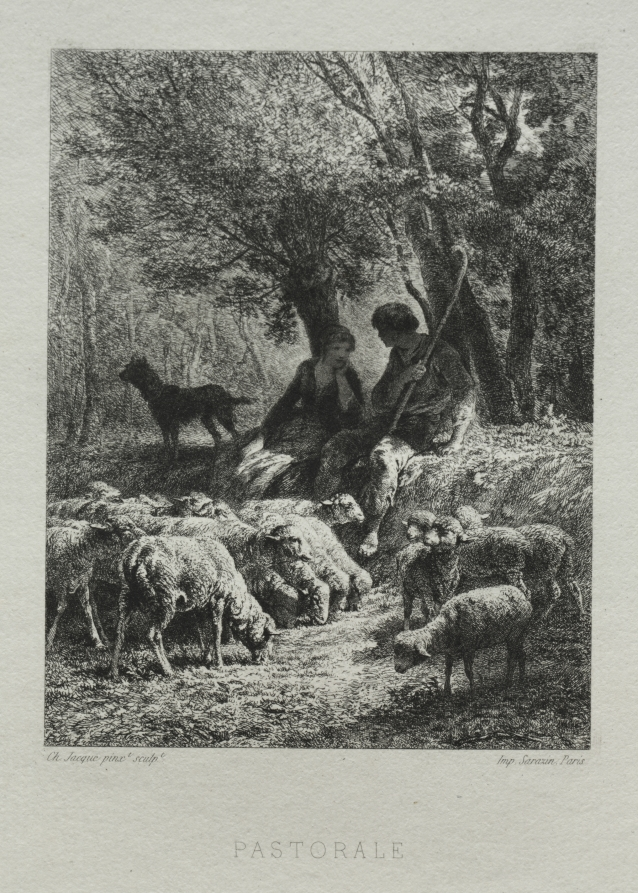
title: Pastorale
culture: France, 19th century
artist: Charles-Émile Jacque (French, 1813–1894)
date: 1864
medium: etching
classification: Print